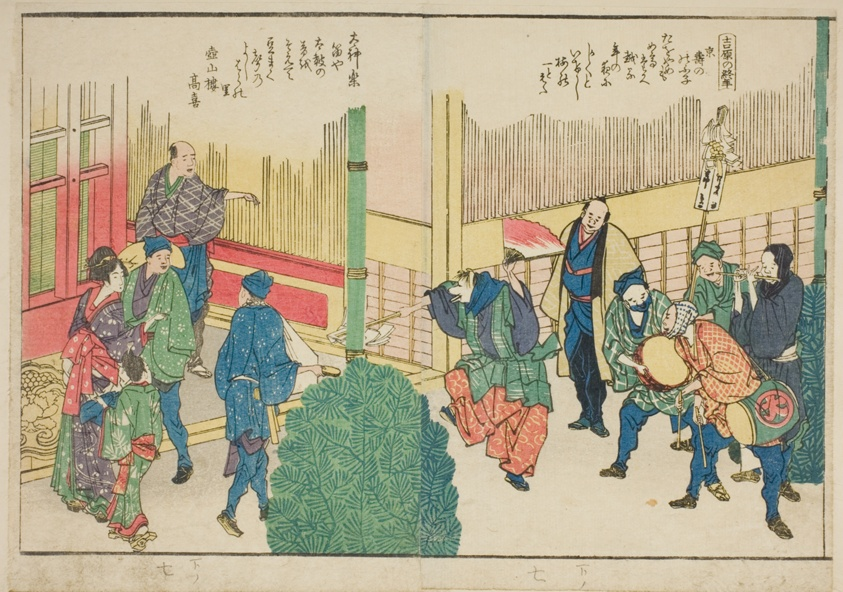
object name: Print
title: Pages from the illustrated book "Panoramic Views along the Banks of the Sumida River (Ehon Sumidagawa ryogan ichiran)"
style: Japanese (culture or style)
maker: Katsushika Hokusai 葛飾 北斎; Japanese, 1760-1849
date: 1801, 1804, or 1806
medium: Color woodblock print; double-page illustration from book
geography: Japan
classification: woodblock print; print; asian art